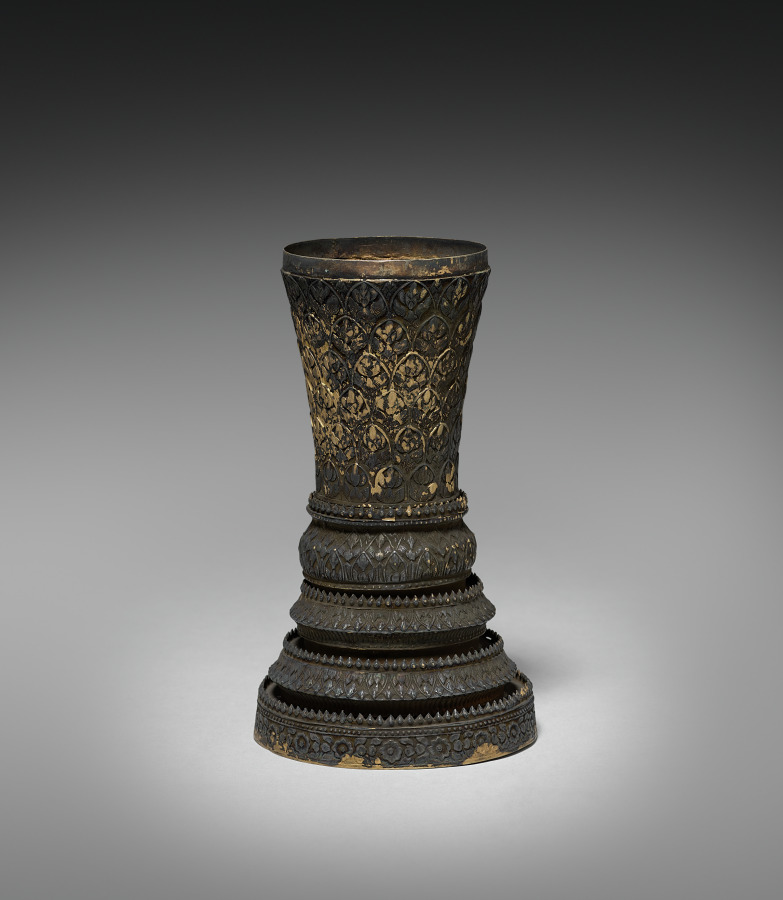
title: Burial Urn (base)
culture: Siam, 19th century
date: 1800s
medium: gold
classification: Metalwork